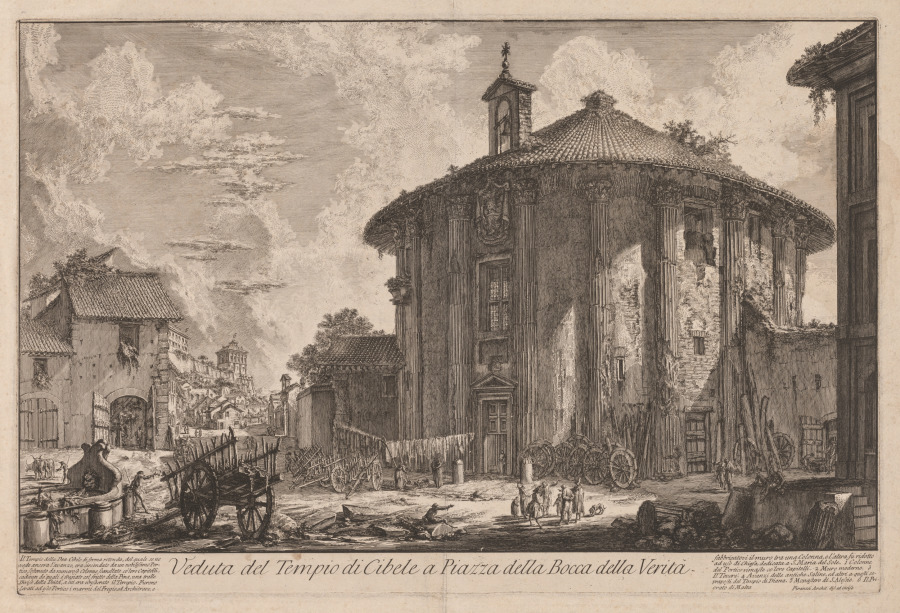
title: Views of Rome: The Temple of Portunus (?)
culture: Italy, 18th century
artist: Giovanni Battista Piranesi (Italian, 1720–1778)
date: 1758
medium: etching and engraving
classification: Print